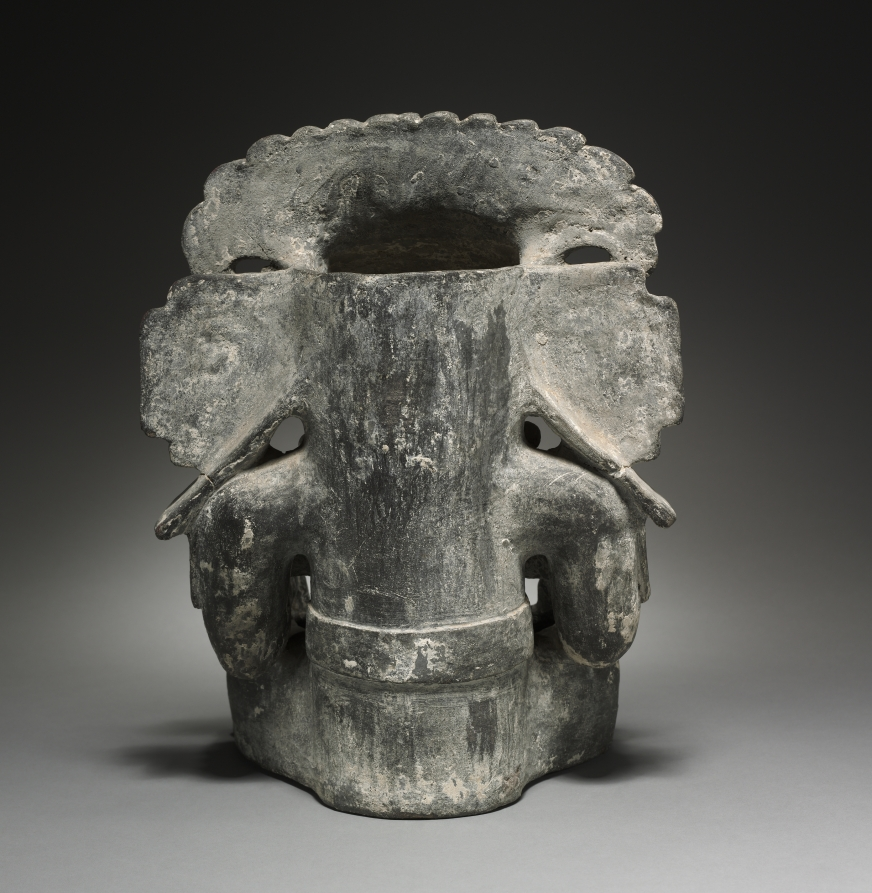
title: Effigy Urn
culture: Mexico, Zapotec, Monte Albán IIIB style, 20th century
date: 1900s (Thermoluminescence date, after 1930)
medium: gray pottery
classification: Sculpture